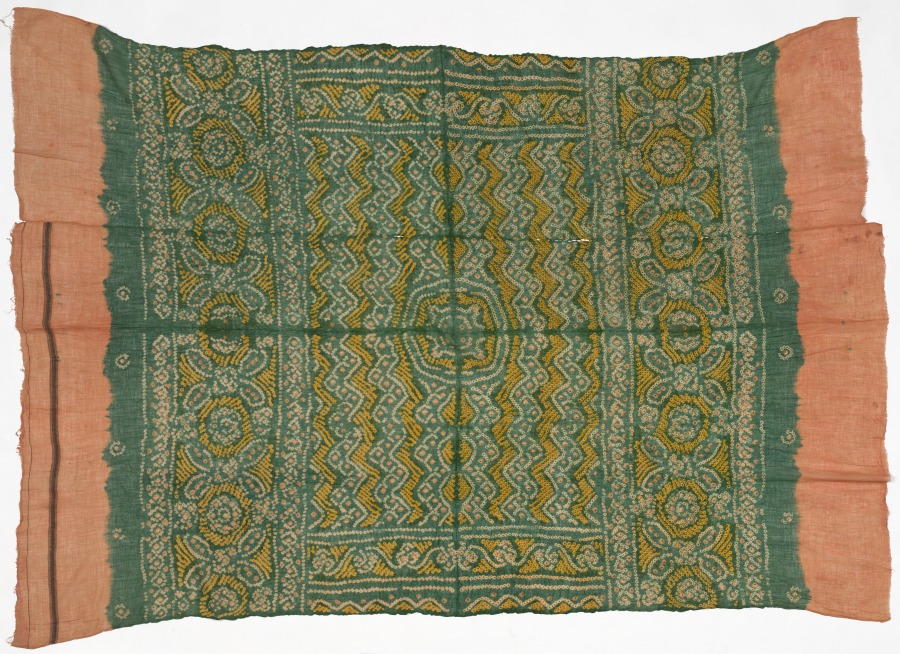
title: Fragment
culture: India, 19th century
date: 1800s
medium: cotton; tied and dyed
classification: Textile